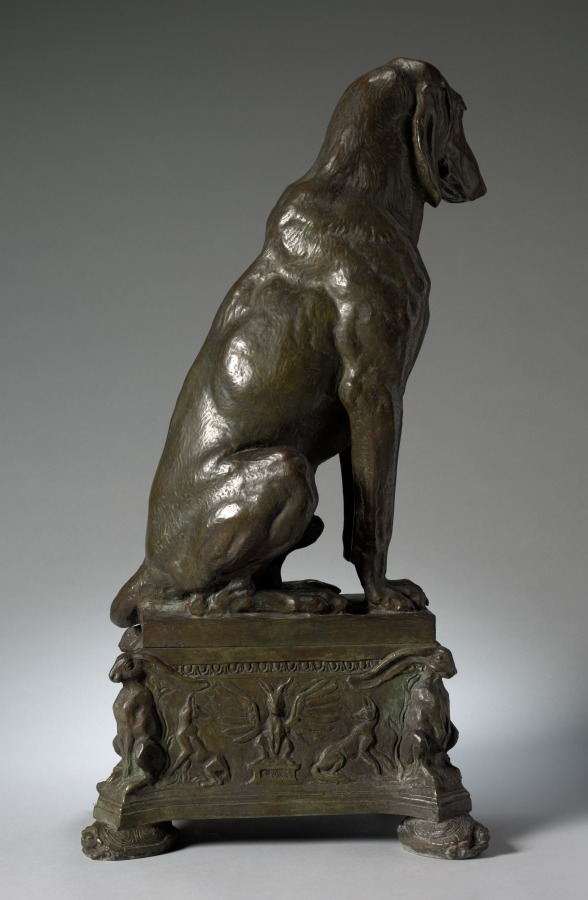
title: Hound (2 of 2)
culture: America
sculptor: Charles Cary Rumsey (American, 1879–1922)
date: 1912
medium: bronze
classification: Sculpture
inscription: Signed on plinth: © C. C. Rumsey